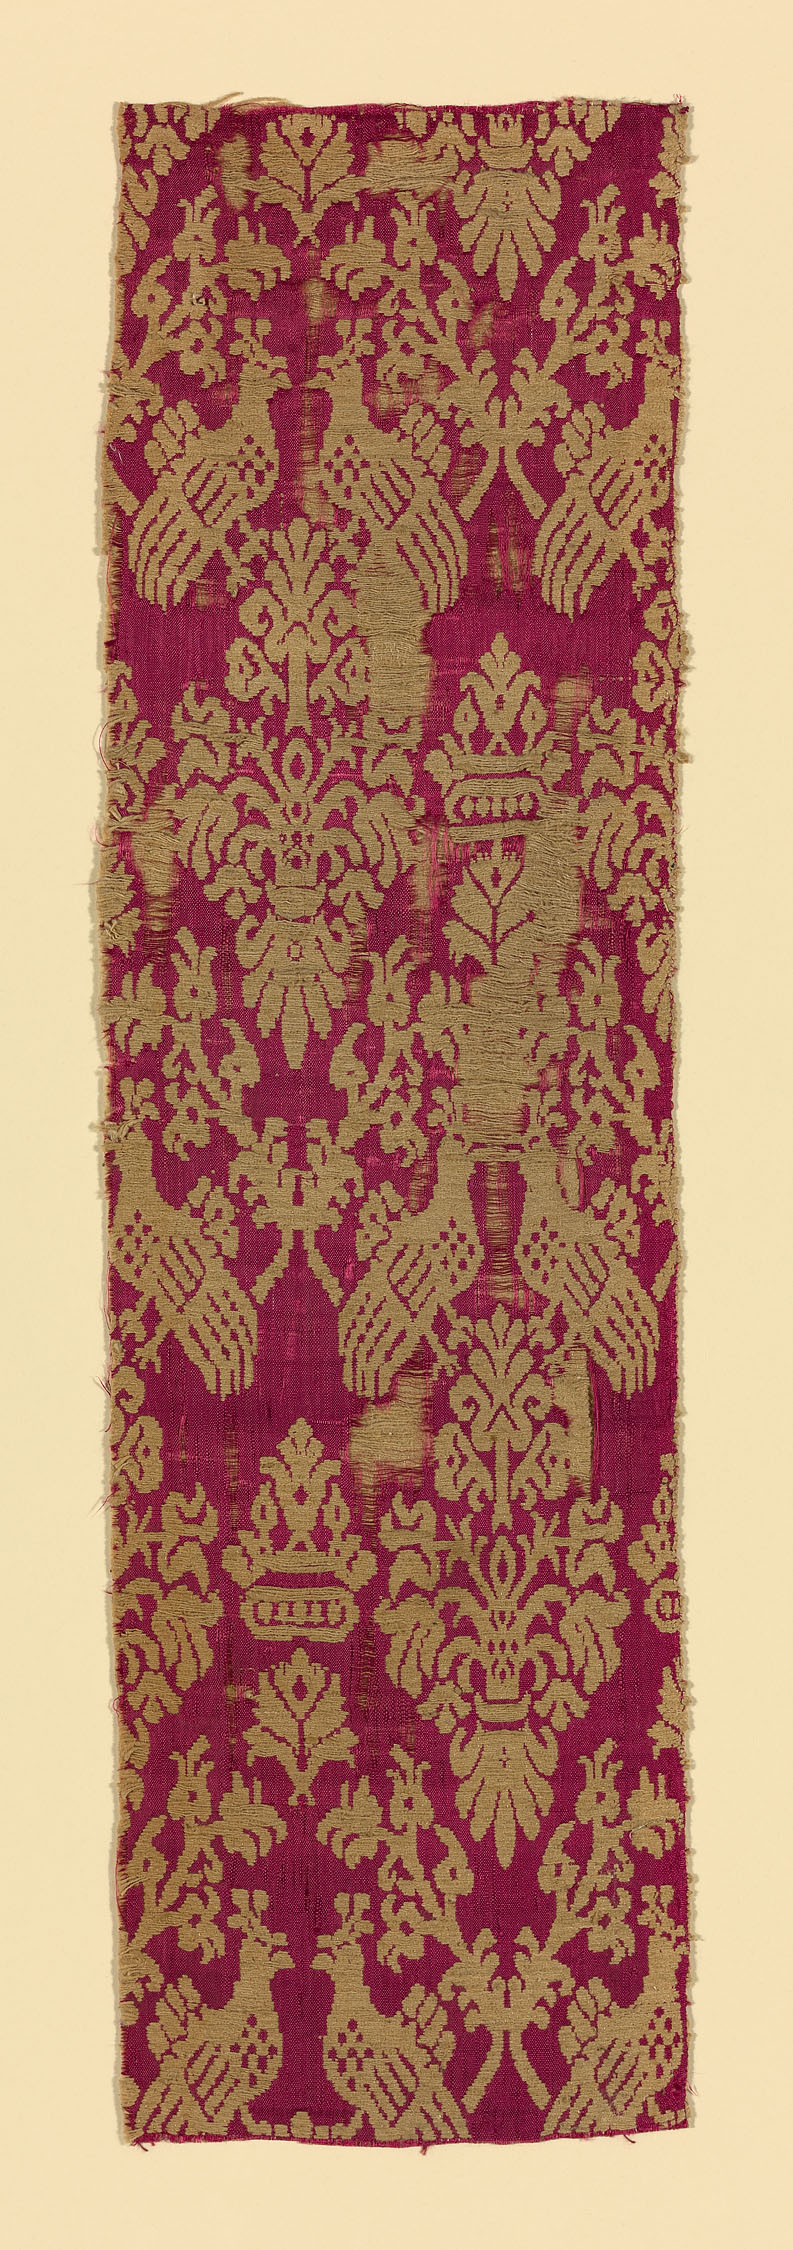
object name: Textile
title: Fragment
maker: Italy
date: 1600/50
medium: Silk, linen, and cotton, plain weave; tied and free double cloth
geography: Italy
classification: textile; weaving